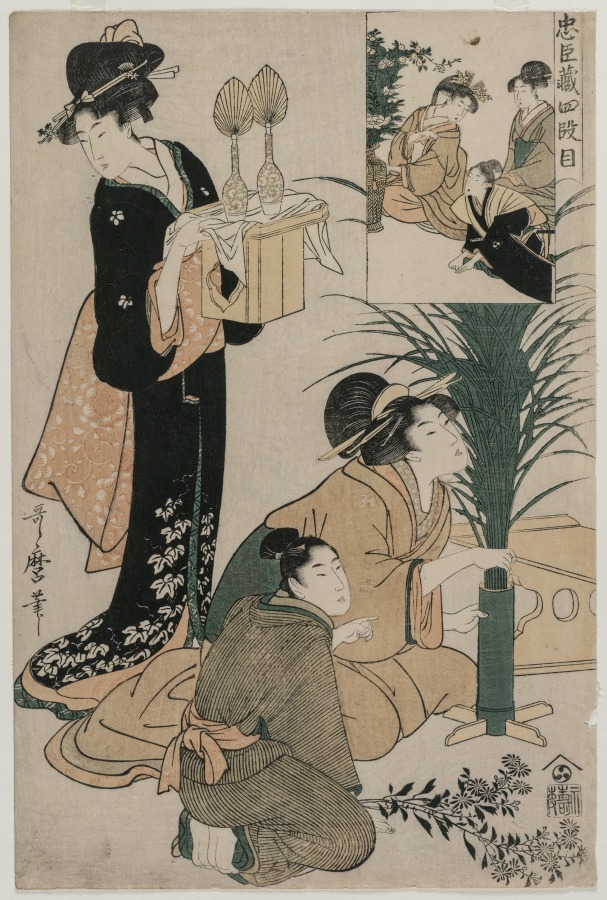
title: Chushingura: Act IV of The Storehouse of Loyalty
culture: Japan, Edo period (1615–1868)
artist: Kitagawa Utamaro (Japanese, c. 1754–1806)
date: late 1790s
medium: color woodblock print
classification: Print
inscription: Signature: Utamaro hitsu Publisher: Nishimuraya Yohachi (Eiju han, emblem)